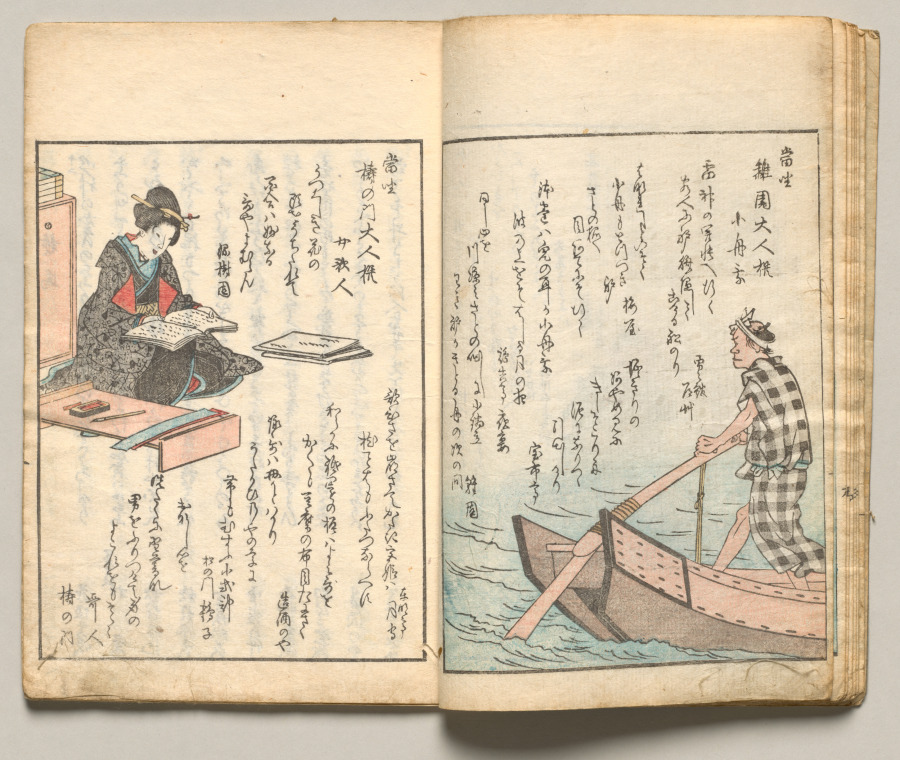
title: Spread Eight from Volume Seven of People of Japan in Light Verse (Kyōka)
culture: Japan, Edo period (1615–1868)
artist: Utagawa Hiroshige (Japanese, 1797–1858)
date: 1857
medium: Woodblock-printed book; ink and color on paper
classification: Bound Volume